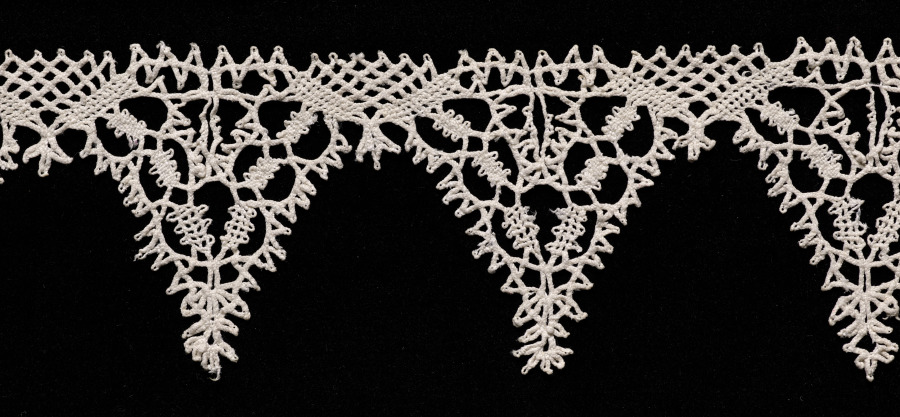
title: Lace Insertion and Edging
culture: Italy, Venice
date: 1540–60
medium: Bobbin lace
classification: Lace